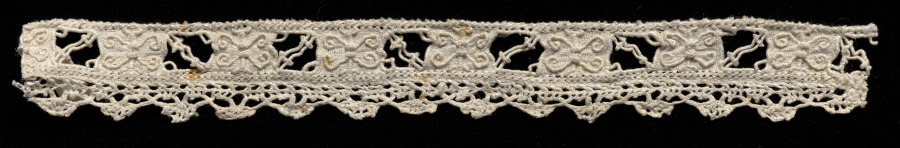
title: Edging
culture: Italy, Venice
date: 1500s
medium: Linen: needle lace (cutwork and reticella) and bobbin lace edging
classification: Lace